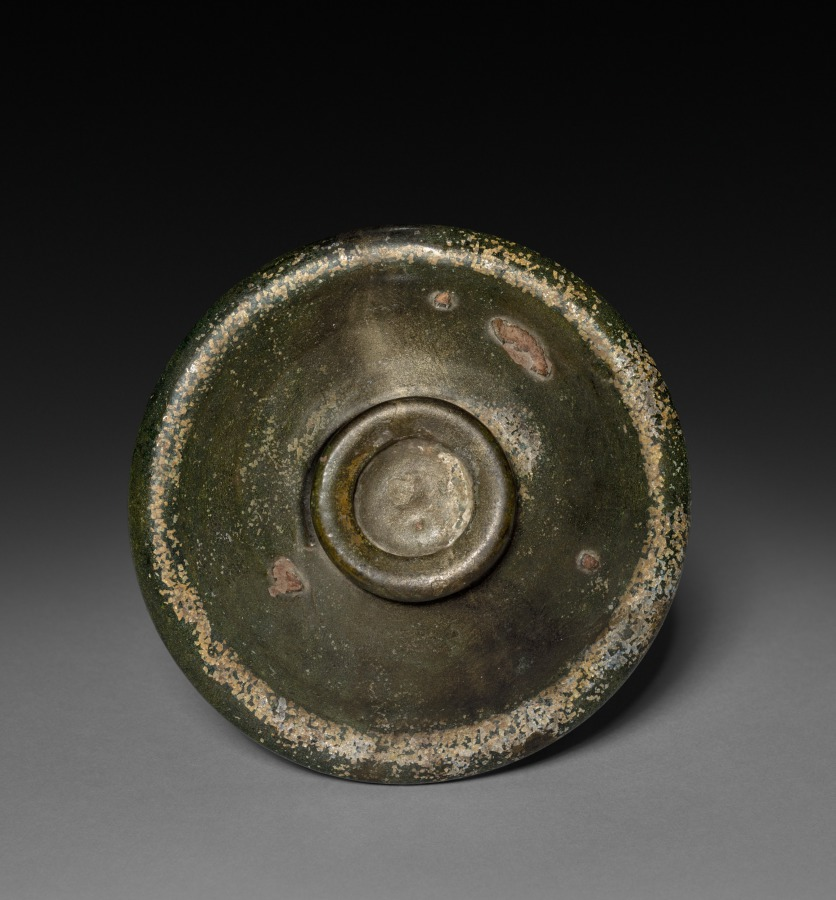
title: Jar with Cover (lid)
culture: China, Han dynasty (202 BCE–220 CE)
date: 206 BCE–220 CE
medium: glazed earthenware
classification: Ceramic